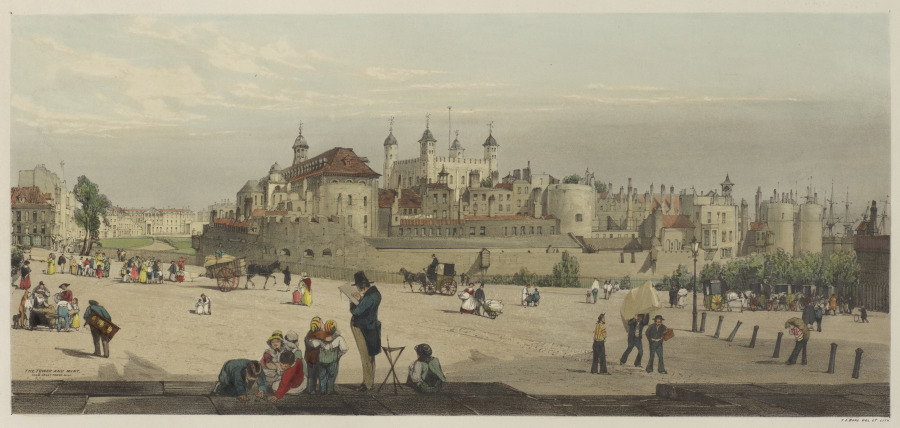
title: London As It Is: The Tower and Mint, from Great Tower Hill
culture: England, 19th century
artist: Thomas Shotter Boys (British, 1803–1874)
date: 1842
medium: lithograph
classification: Bound Volume